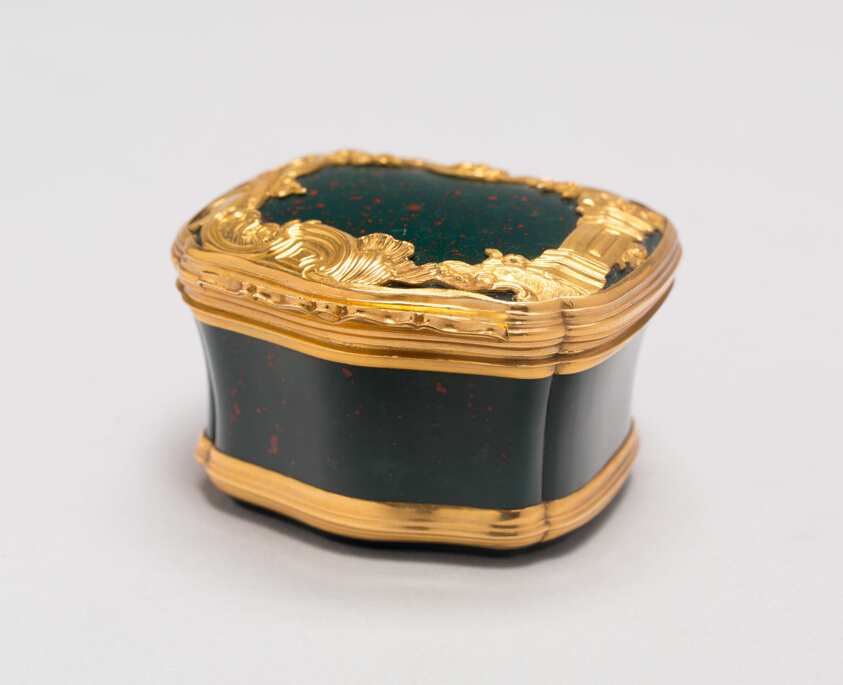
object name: Metalwork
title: Pill Box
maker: London, England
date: c. 1750/60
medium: Gold and bloodstone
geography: England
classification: accessories (object genre); european decorative arts; metalwork